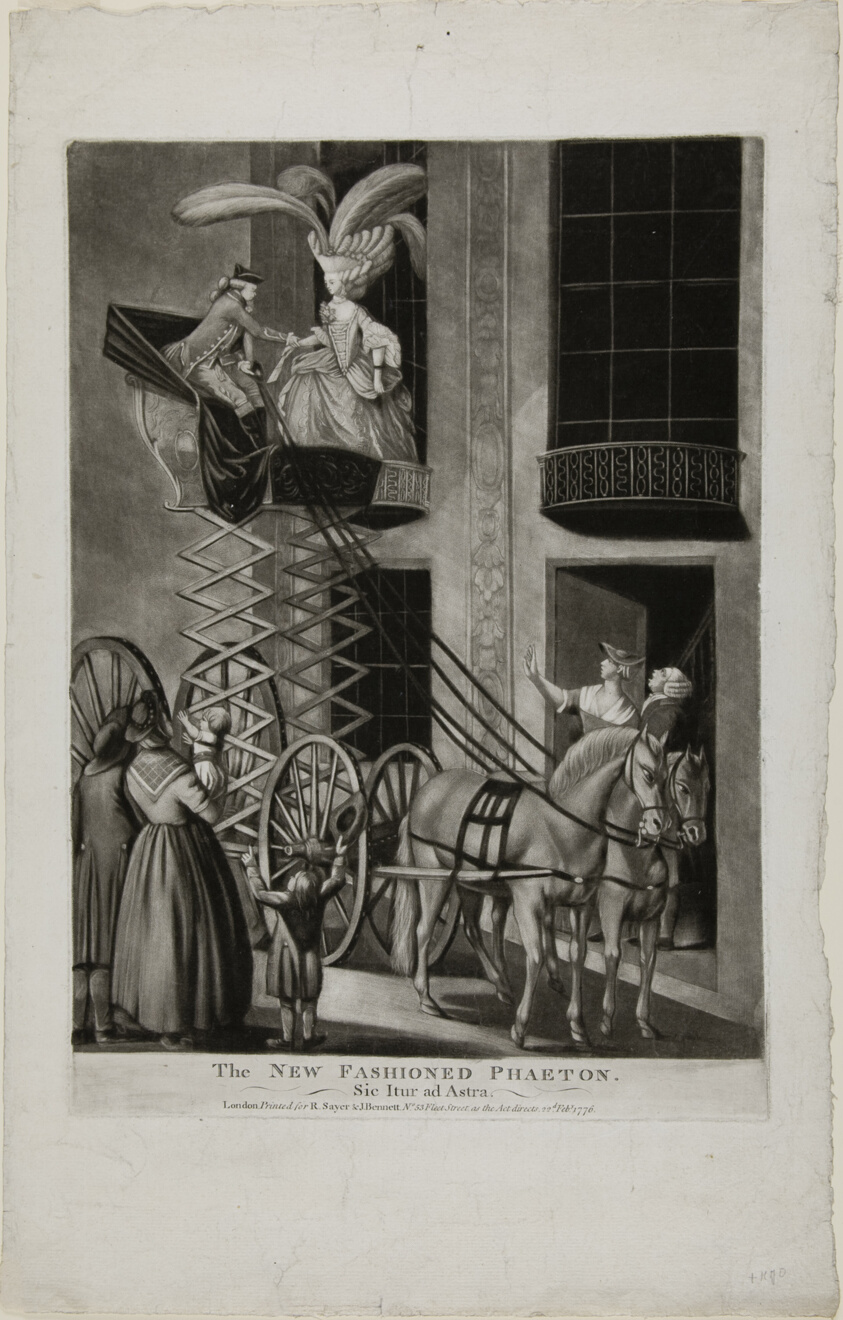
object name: Print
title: The New Fashioned Phaeton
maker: Attributed to Philip Dawe; English, 1750-1785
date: 1776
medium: Mezzotint with touches of engraving in black on off-white laid paper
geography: England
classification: mezzotint; print; prints and drawing